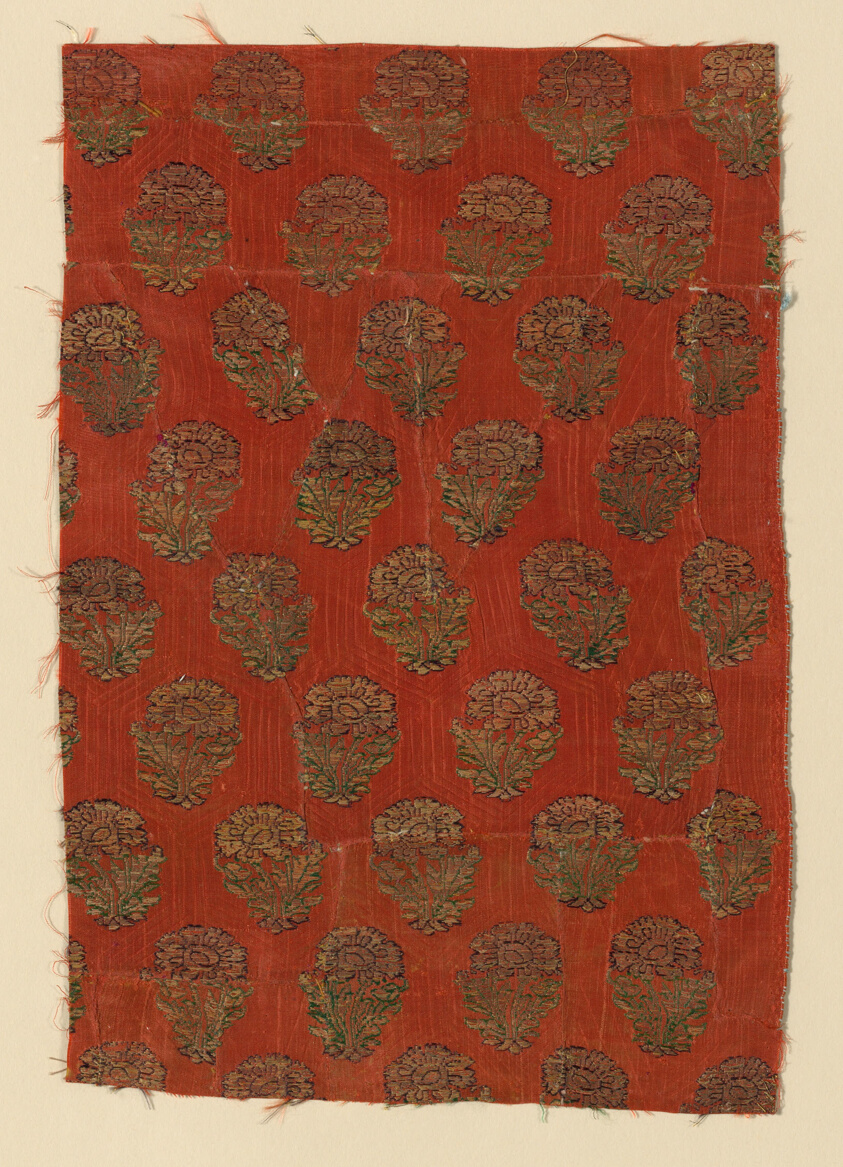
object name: Textile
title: Fragment (Dress Fabric)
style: isfahan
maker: Iran (Isfahan)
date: 18th century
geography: Iran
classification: textile; weaving